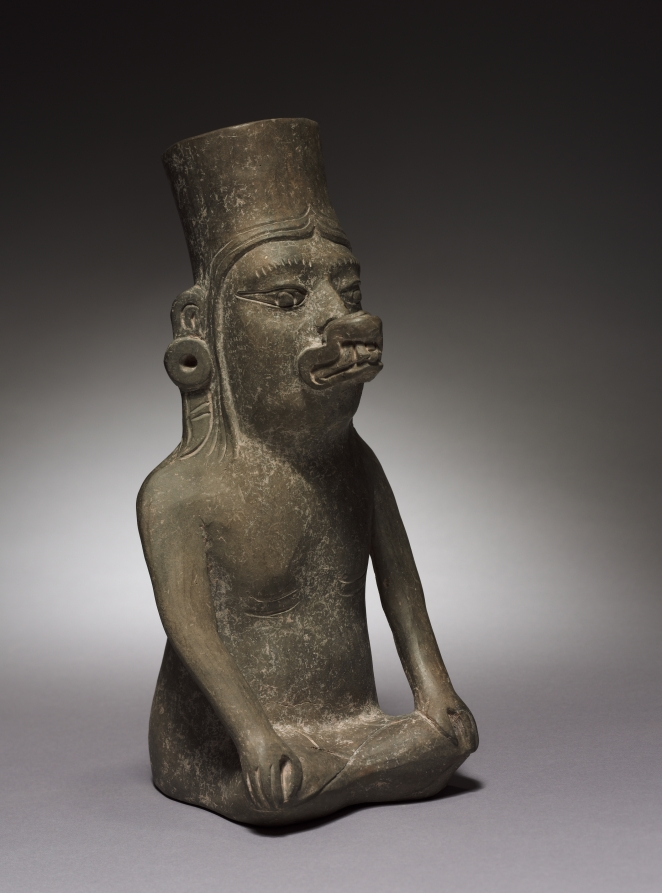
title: Urn Figure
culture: Mexico, Oaxaca, Zapotec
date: c. 150 BCE–200 CE (thermoluminescence date, 60 BCE–642 CE)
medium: earthenware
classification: Sculpture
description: This simply posed and costumed urn figure represents a goddess, or perhaps an ancestress. Early Zapotec ceramic art has a spare elegance that contrasts strongly with the florid ornamentation of later works.